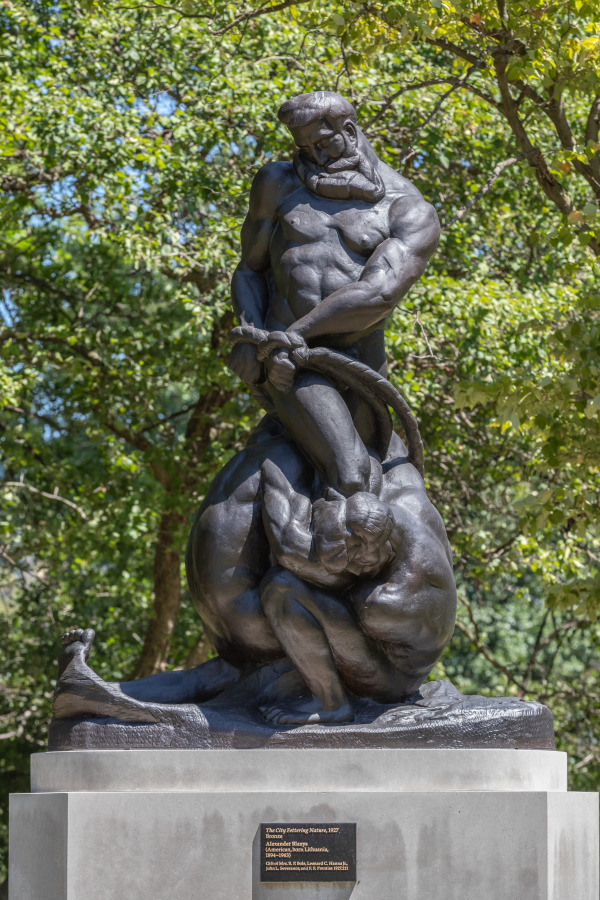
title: The City Fettering Nature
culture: America, Ohio, Cleveland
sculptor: Alexander Blazys (American, born Russian Empire [now Lithuania], 1894–1963)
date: 1927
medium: bronze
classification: Sculpture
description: Alexander Blazys, a Lithuanian immigrant, became a leading sculptor in Cleveland during the 1920s, when he created The City Fettering Nature for the Cleveland Museum of Art’s grounds. In this composition, Utility and Beauty, two characteristics of the city, are shown as intertwined figures attempting to subdue Nature’s power. The brawny figure of Nature, still standing despite this attack, struggles to free himself from the restraints.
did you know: This monumental bronze sculpture weighs 1,500 pounds and requires a crane to install.